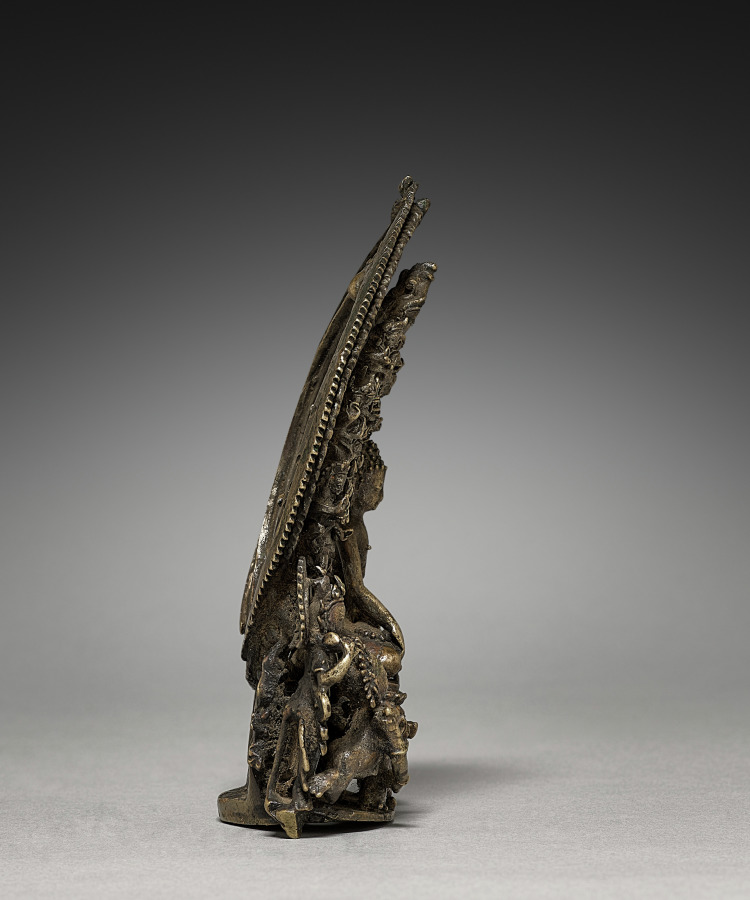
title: Triumph of the Buddha, Marvijaya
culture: Nepal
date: 1400s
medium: bronze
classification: Sculpture